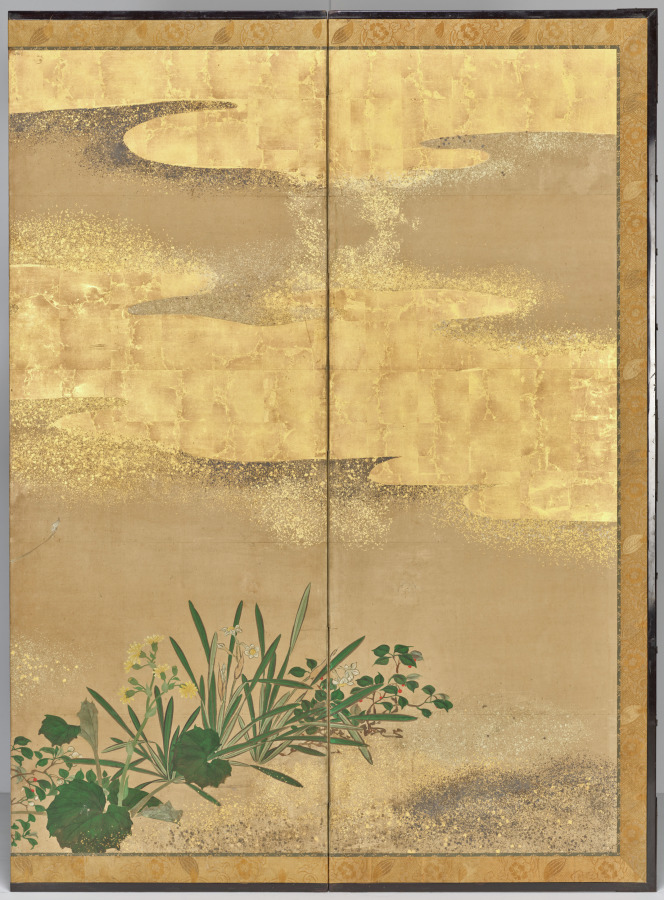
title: Flowers and Trees of the Four Seasons (left screen)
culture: Japan, Edo period (1615–1868)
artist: Watanabe Shikō (Japanese, 1683–1755)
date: early to mid-1700s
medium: Six-panel folding screen; ink, color, gold, silver, and gilding on paper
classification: Painting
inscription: 始興之印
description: The painter Watanabe Shikō had a special interest in scientific realism, based on interactions with his patron Konoe Iehiro. Shikō combined his attention to accurate depiction of plants with strong ink outlines and decorative elements like gold and silver, arriving at an innovative style that influenced many of his peers in the city of Kyoto.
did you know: One plant in these screens, tumeric, or ukon in Japanese, is found in Okinawa.